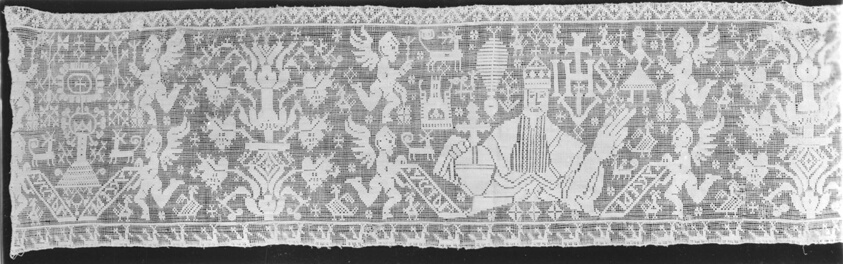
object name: Religious/Ritual Object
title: Altar Border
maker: Greece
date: 18th century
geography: Greece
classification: textile; lace - needle; liturgical; ritual objects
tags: altar